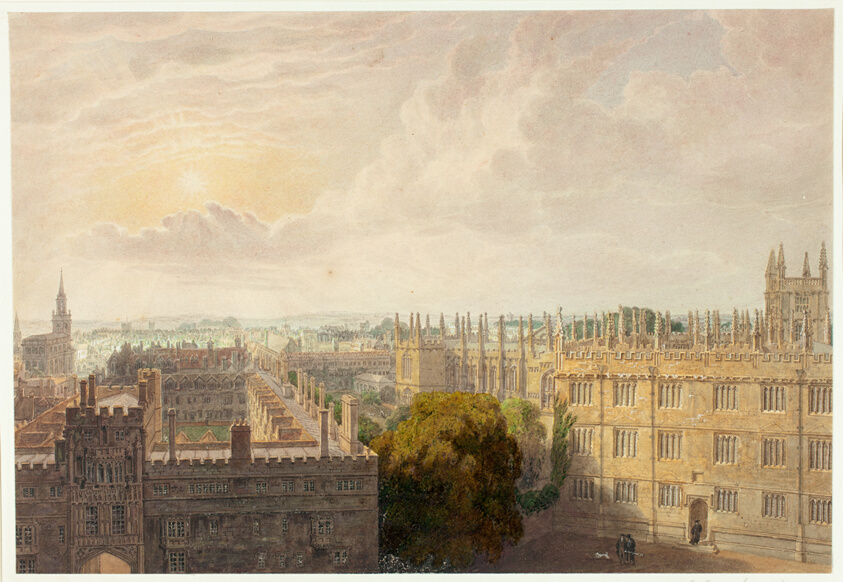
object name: Drawing and Watercolor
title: View From Radcliffe Library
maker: Frederick MacKenzie (English, born Scotland, 1787-1854)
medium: Watercolor, with pen and brown ink, heightened with white gouache, selectively varnished, on cream wove paper, laid down on ivory wove paper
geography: France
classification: watercolor; drawings (visual works); prints and drawing